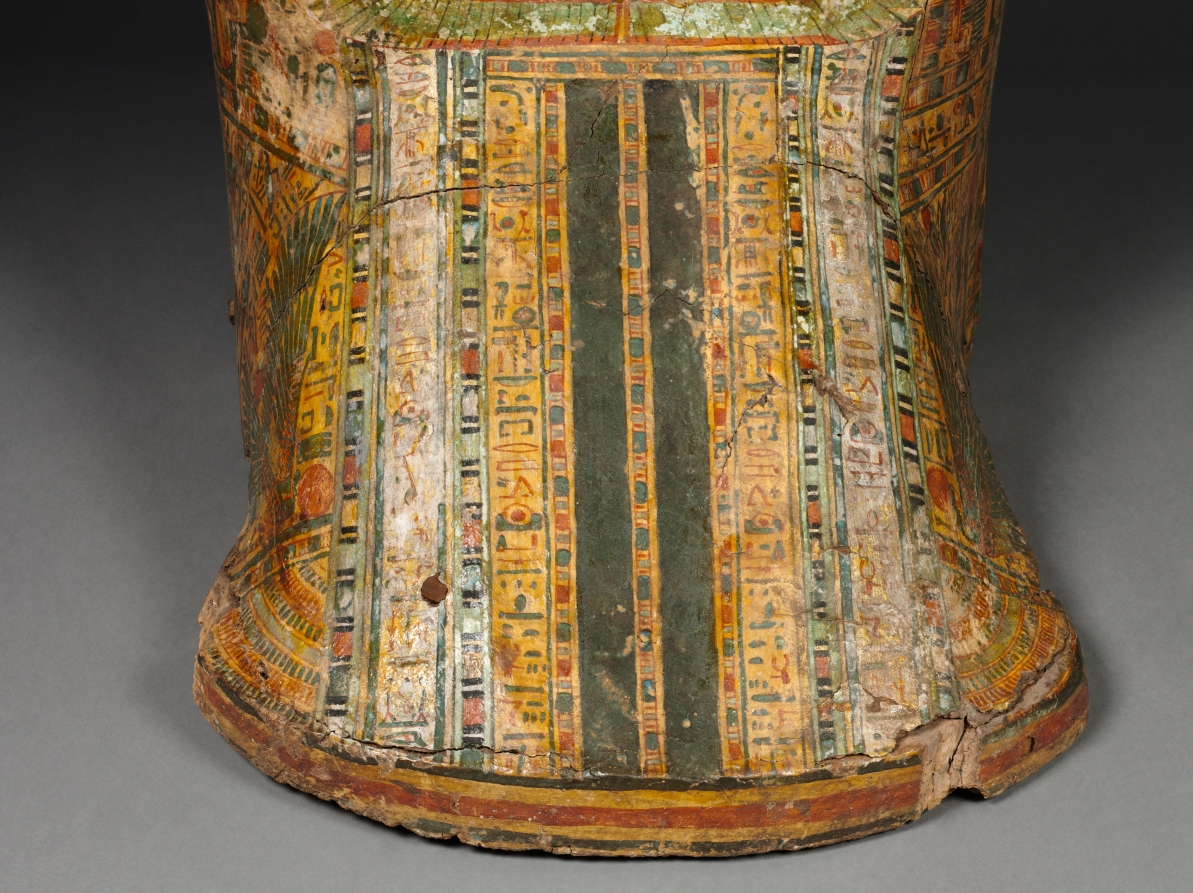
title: Coffin of Nesykhonsu (lid)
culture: Egypt, Third Intermediate (1069–715 BCE), Dynasties 21–22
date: c. 976–889 BCE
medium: gessoed and painted sycamore fig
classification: Funerary Equipment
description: A complete set of coffins during the late New Kingdom and Third Intermediate Period consisted of an outer and inner coffin and a mummy board (essentially a lid without a case, placed directly over the wrapped mummy). Judging by its size, this must have been Nesykhonsu's outer coffin. The type is essentially the same as the coffin of Bakenmut, which was also an outer coffin. The two coffins are said to have been found together and to have belonged to a man and wife. This is quite possible, although the inscriptions do not bear it out. Bakenmut is not mentioned on Nesykhonsu's coffin, nor is she mentioned on his. There was by this time a tremendous repertoire of scenes appropriate for coffin decoration. Whereas Bakenmut's coffin features images of deified dead pharaohs, Nesykhonsu's is decorated in a more personal way with scenes from her own funeral. The main scene in the interior (near the top) shows a priest clad in a panther skin with the mummy of Nesykhonsu behind. The god appears in mummy form and wears a sun disk on his head. The scarab beetle inside the sun disk identifies him as Khepri, the morning sun, and the hieroglyphs to the right identify him as Atum, the evening sun. Taken together, image and text represent the sun god in both his rising and setting, youthful and aged aspects.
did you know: Two of Nesykhonsu's titles, "Lady of the House" and "Singer of the Choir of Mut the Great," are written on the outside of the coffin.